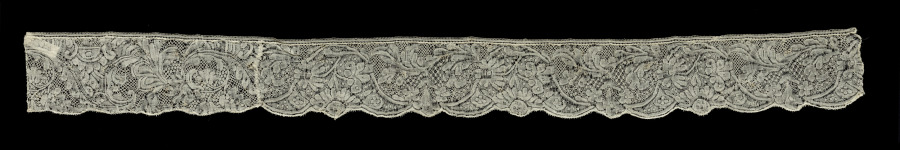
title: Lace Edging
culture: Belgium, Binche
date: 1840–60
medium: Bobbin lace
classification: Lace